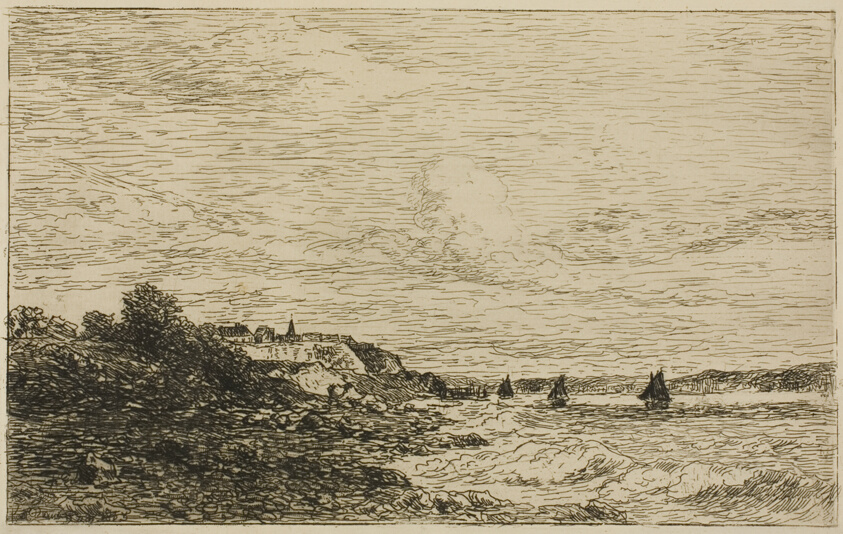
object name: Print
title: The Seine Before Honfleur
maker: Karl Daubigny (French, 1846-1886)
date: 1865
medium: Etching, roulette and drypoint on ivory laid paper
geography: France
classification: etching; print; prints and drawing